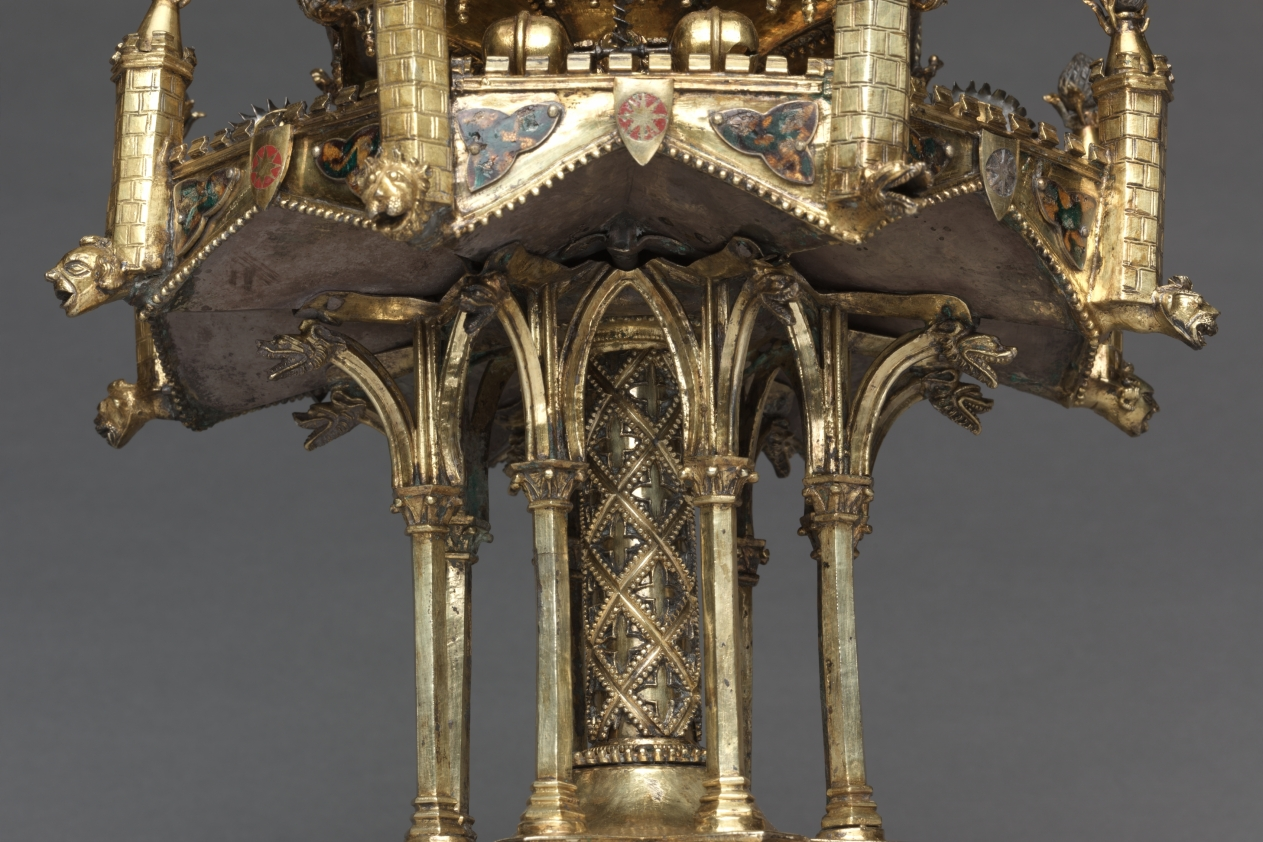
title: Table Fountain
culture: France, Paris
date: c. 1320–40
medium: gilt-silver and translucent enamels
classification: Metalwork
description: Conceptually and stylistically, this object is beyond all else a piece of Gothic architecture in miniature with vaults, pinnacles, columns, and traceried arches. Though the artist who created it is unknown, he was unquestionably inspired by the great Gothic buildings of his time. The table fountain is a three-tiered assembly combining cast elements with bent sheets of gilt-silver. To these have been attached a series of enamel plaques representing grotesque figures, some of which play musical instruments. Water wheels and bells were added to capture motion and sound. The rich detail, precious materials, and involved ornamentation of this deluxe object suggest it would have been expensive to produce and highly treasured by its original owner, someone of high status, and would have been deployed as an object of spectacle. This is the most complete example of its type known to survive from the Middle Ages. Medieval inventories reveal that small fountains like this, often taking various forms, and generally made from precious metals, once existed in large numbers, thus making the Cleveland table fountain an extremely rare object.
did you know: This fountain with its minute architectural details and finely made enamel plaques displayed the wealth and refinement of the owner as it entertained his guests. Imagine hearing the ringing of the tiny bells when this fountain was in use.